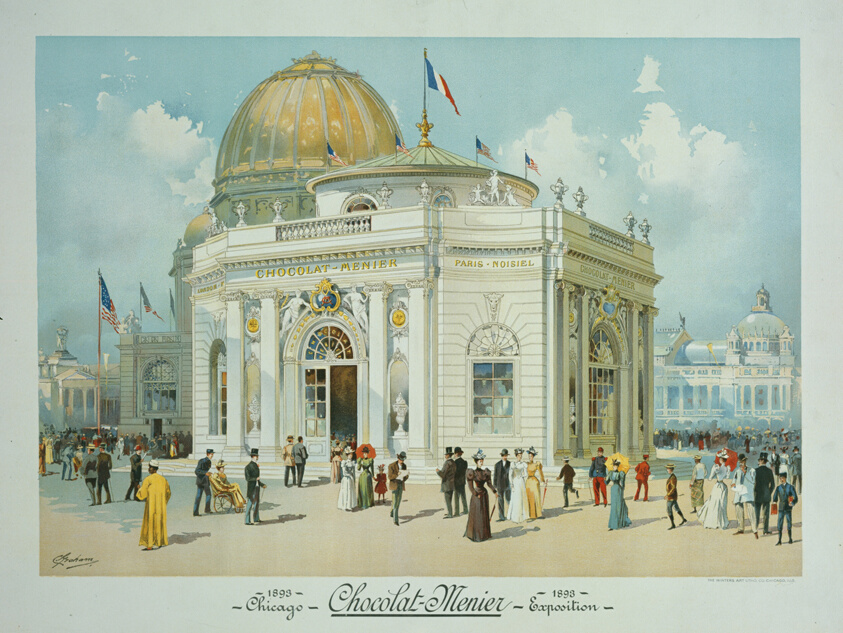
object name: Architectural Drawing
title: Chocolate-Menier Pavilion, World's Columbian Exposition, Chicago, Illinois, Perspective View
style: 19th century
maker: Peter Joseph Weber (American, 1863-1923); C. Graham (American)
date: 1893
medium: Color lithograph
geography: United States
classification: design drawing; architectural drawing; architecture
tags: world's fairs, Chicago, pavilions, perspective, architecture, design